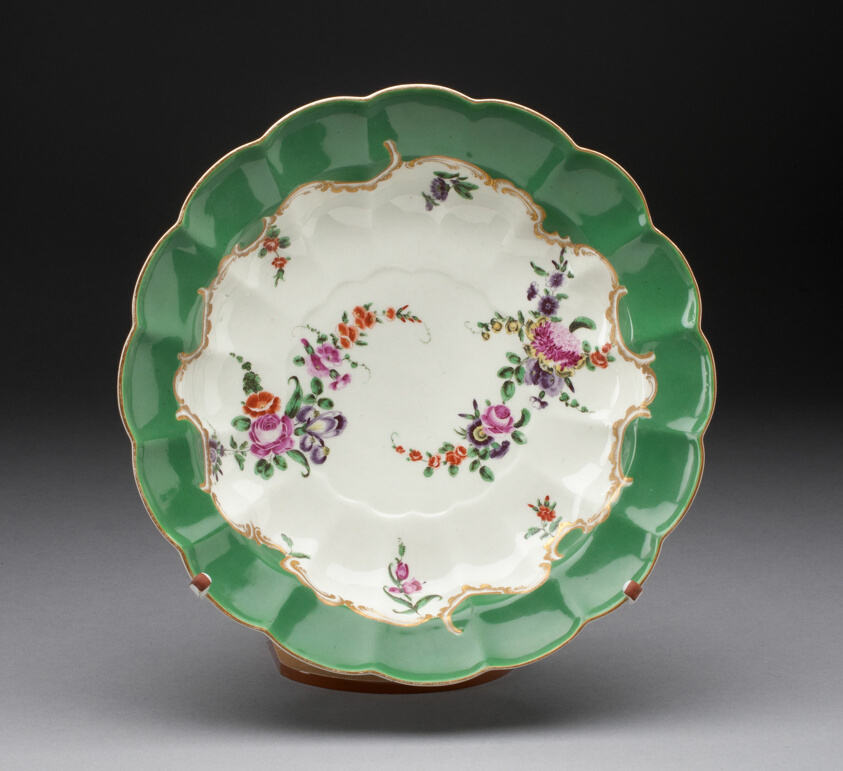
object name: Ceramics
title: Bowl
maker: Worcester Porcelain Factory (Warmstry House Period, 1751–1783); Worcester, England, founded 1751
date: c. 1770/75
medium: Soft-paste porcelain, polychrome enamels and gilding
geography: Worcester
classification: bowl; dish (vessel); porcelain; european decorative arts; ceramics